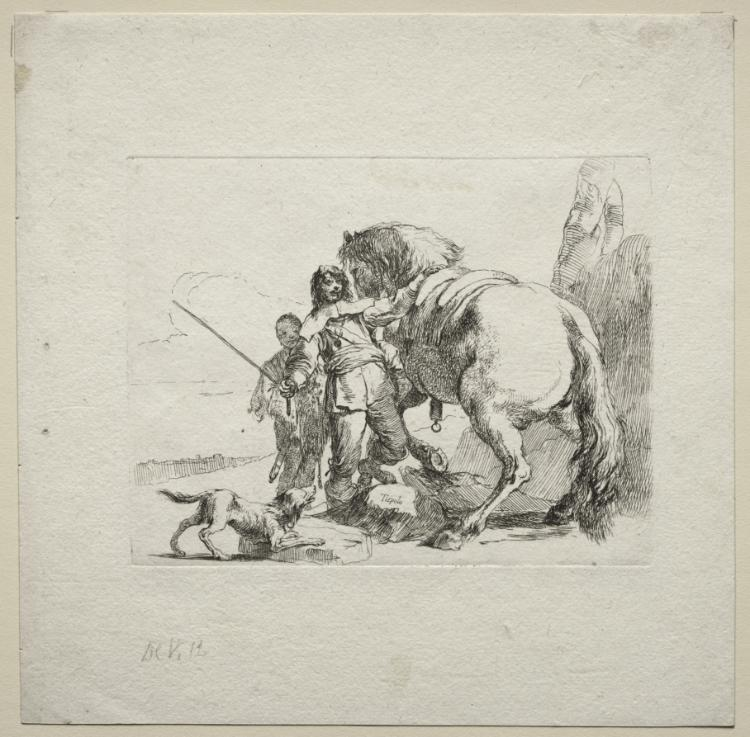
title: Various Caprices: The Cavalier Mounting his Horse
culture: Italy, 18th century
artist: Giovanni Battista Tiepolo (Italian, 1696–1770)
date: 1735–50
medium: etching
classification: Print